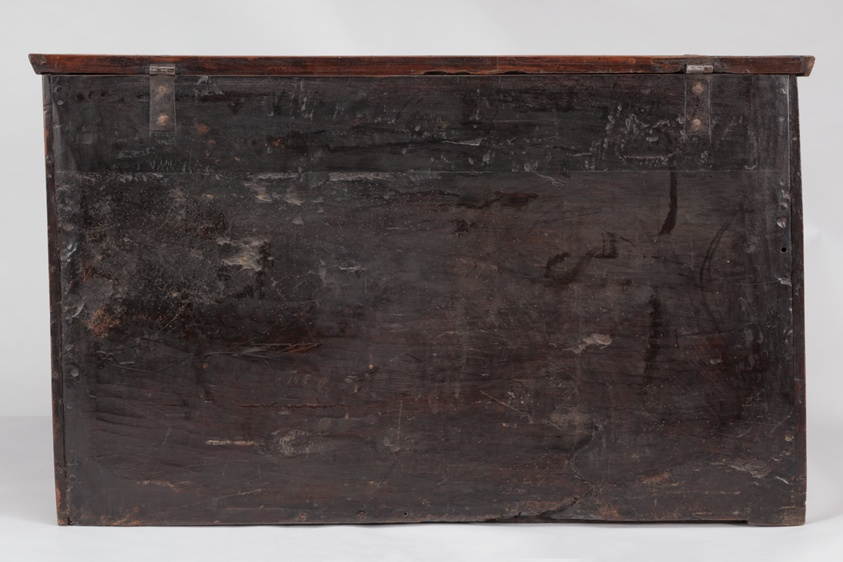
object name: Furniture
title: Writing Cabinet (Escritorio)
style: Islamic, hispano-moresque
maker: Spanish, possibly Granada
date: 1500/50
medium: Walnut, boxwood, bone, iron, copper alloy, and gilding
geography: Granada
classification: furniture; islamic; decorative arts; furnishings; furnishings (transportable); inlay; writing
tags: geometric